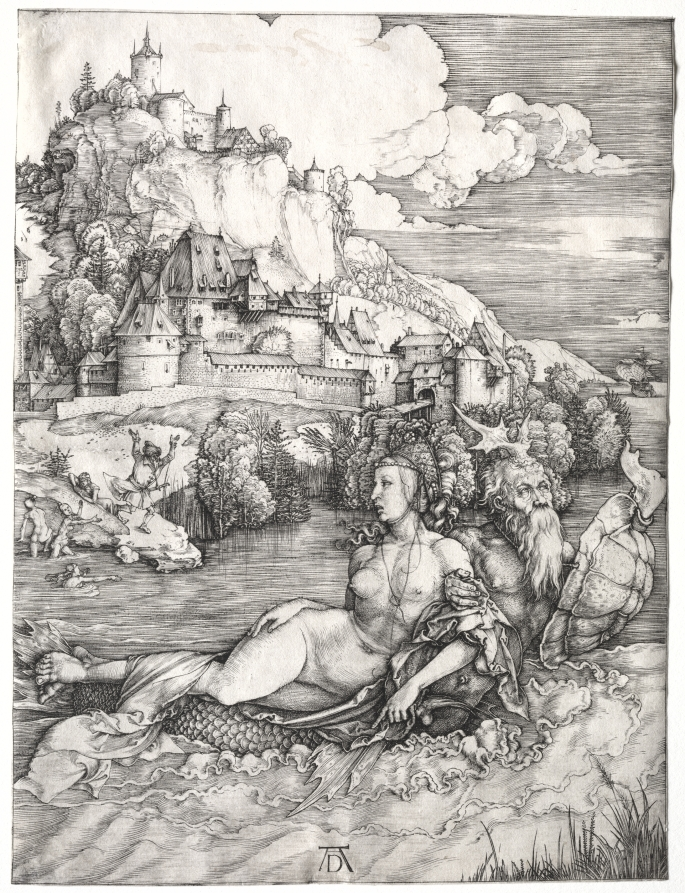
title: The Sea Monster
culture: Germany, late 15th-early 16th Century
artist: Albrecht Dürer (German, 1471–1528)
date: c. 1501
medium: engraving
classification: Print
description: The precise narrative of Dürer’s Sea Monster remains a source of debate among scholars because locating the origin of this imagery in either classical or German mythology has been difficult. The engraving depicts a woman’s abduction by a horned mythical hybrid creature that has the torso of a man and the tail of a fish. Set before a detailed coastal landscape featuring Nuremberg castle, the woman’s companions across the river flail their arms in distress over her kidnapping. While it is clear that Dürer aimed to showcase his achievements in portraying a reclining female nude, her somewhat blasé appearance and lack of struggle add to the peculiarity of this image.